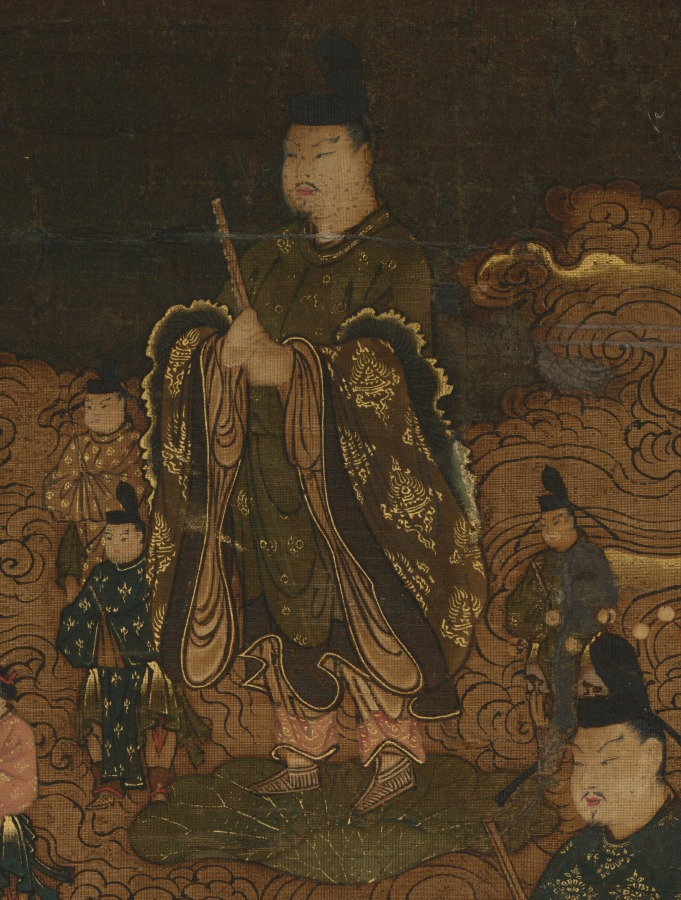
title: Descent of the Nine Luminaries and the Seven Stars at Kasuga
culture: Japan, Nanbokuchō period (1336–92)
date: mid- to late 1300s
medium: Hanging scroll; ink, color, gold and cut gold on silk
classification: Painting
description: This medieval religious painting shows celestial beings descending from the heavens into the Kasuga Shrine, a major religious site in Japan's ancient capital, Nara. The moon and the Kasuga mountain range appear in the uppermost portion of the painting, as does a red shrine entrance gate, or torii. In the upper part of the painting, figural representations of the stars in the constellation known as the Big Dipper in the West descend from right to left on cloud banks. In the lower part, the Nine Luminaries (Sanskrit: Navagraha) that emerged from the Vedic tradition—the sun and moon; the planets Jupiter, Mars, Saturn, Venus, and Mercury; and personifications of the fluctuating lunar nodes—descend in similar fashion. The painting uses the "deities in descent" scheme originating in China, as well as the original Buddhist form mandala (Japanese: honjibutsu mandarazu) format prevalent in medieval Japanese Shinto-Buddhist painting, to generate an image connected to the worship of celestial bodies in Esoteric Buddhism.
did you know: A 19th-century copy of this painting in ink and light color exists at the Kyoto City University of Arts.